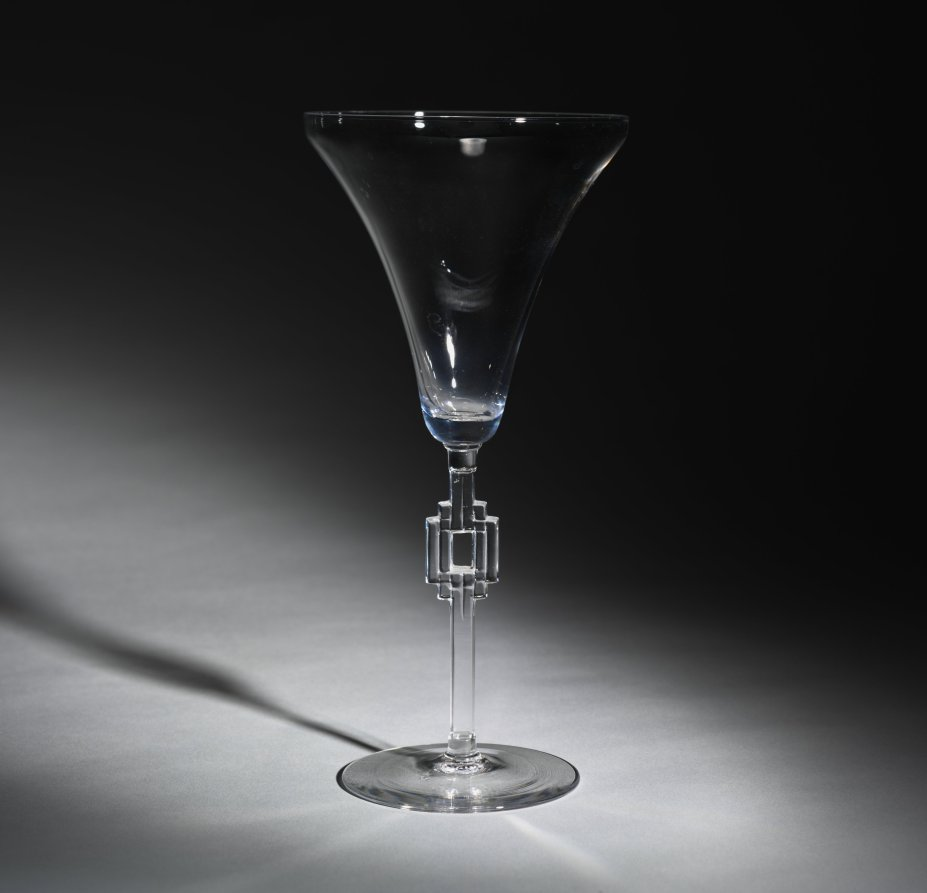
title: Wine Glass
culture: France, 20th century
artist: René Lalique (French, 1860–1945)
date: 1925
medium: glass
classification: Glass